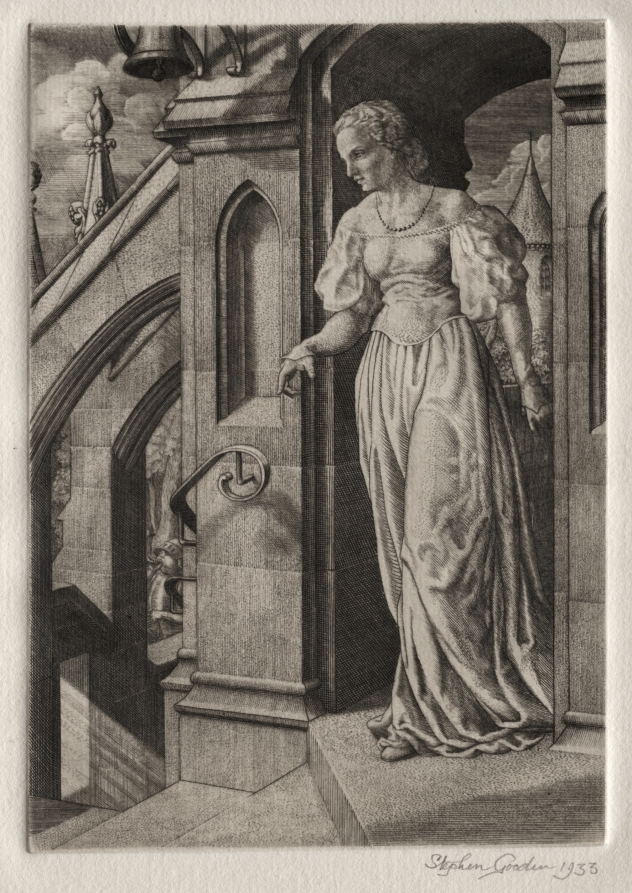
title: Illustration for "Peronnik the Fool": Redemonde on the Staircase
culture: England, 20th century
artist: Stephen Gooden (British, 1892–1955)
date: 1933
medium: engraving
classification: Print